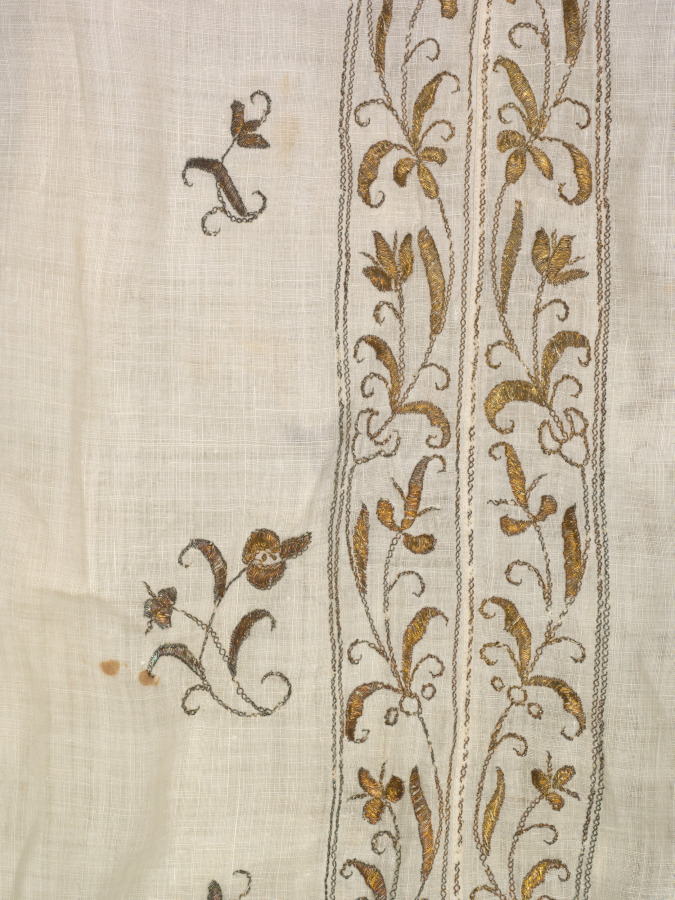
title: Alb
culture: Spain: embroidered linen; Flanders: bobbin lace (Point d’Angleterre) flounce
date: Embroidered Linen: 1600s; Bobbin Lace (Point d’Angleterre) Flounce: 1700s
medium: Plain weave linen embroidered in gold and silver; linen bobbin lace (Point d’Angleterre a Reseau)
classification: Garment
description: This beautiful vestment, called an alb, was worn under other liturgical garments by the clergy who served at the altar. Embroidered with gilt-metal thread flora on a linen ground, it is trimmed with a flounce and cuffs of lace, the most fashionable and expensive material at the time. Its purple silk lining indicates that it belonged to an archbishop. The exquisitely worked bobbin lace consists of two large composite floral designs flanked by popular curved forms on an elaborate bar ground that repeats ten times around the flounce.